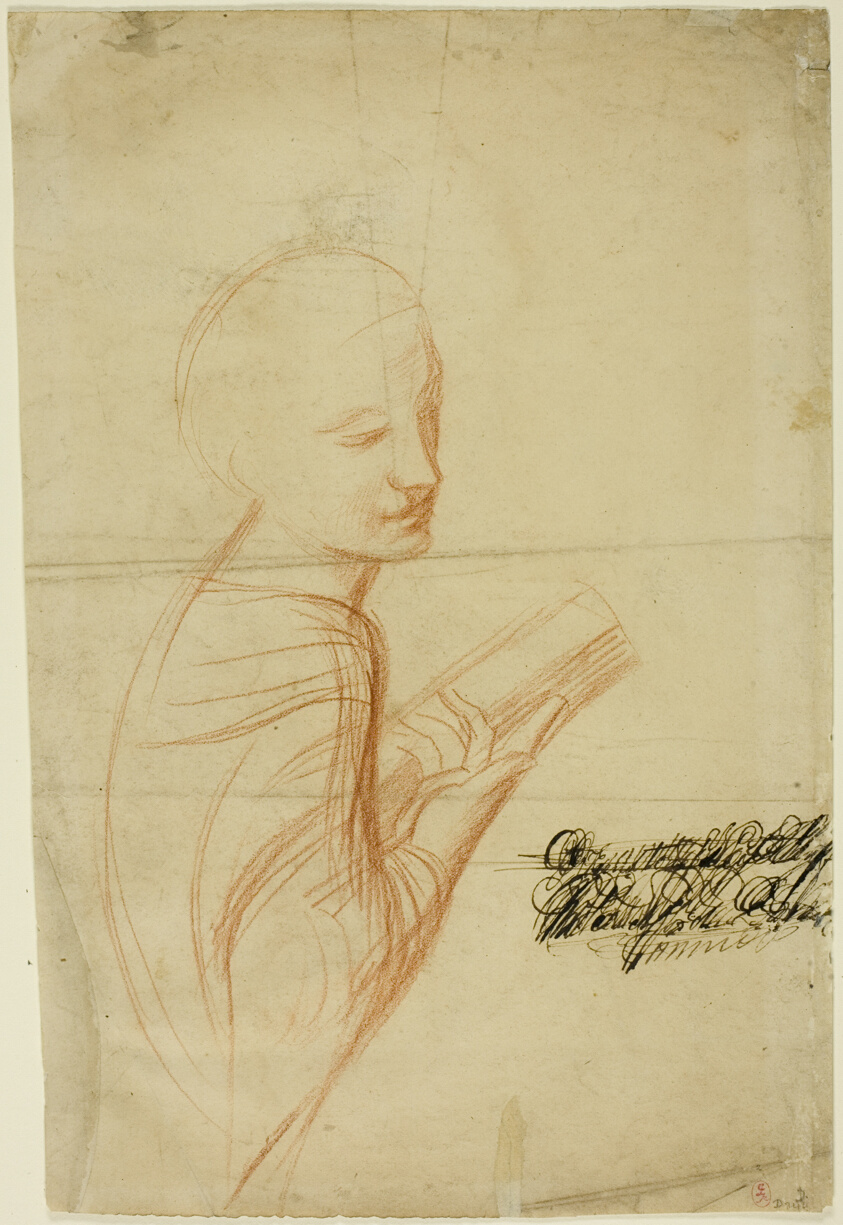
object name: Drawing and Watercolor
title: Woman with Book (recto); Sketches of Male Figure (verso)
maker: Attributed to Alfred George Stevens; English, c. 1817-1875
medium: Red chalk (recto and verso) on tan wove paper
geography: England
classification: chalk; drawings (visual works); prints and drawing; paper